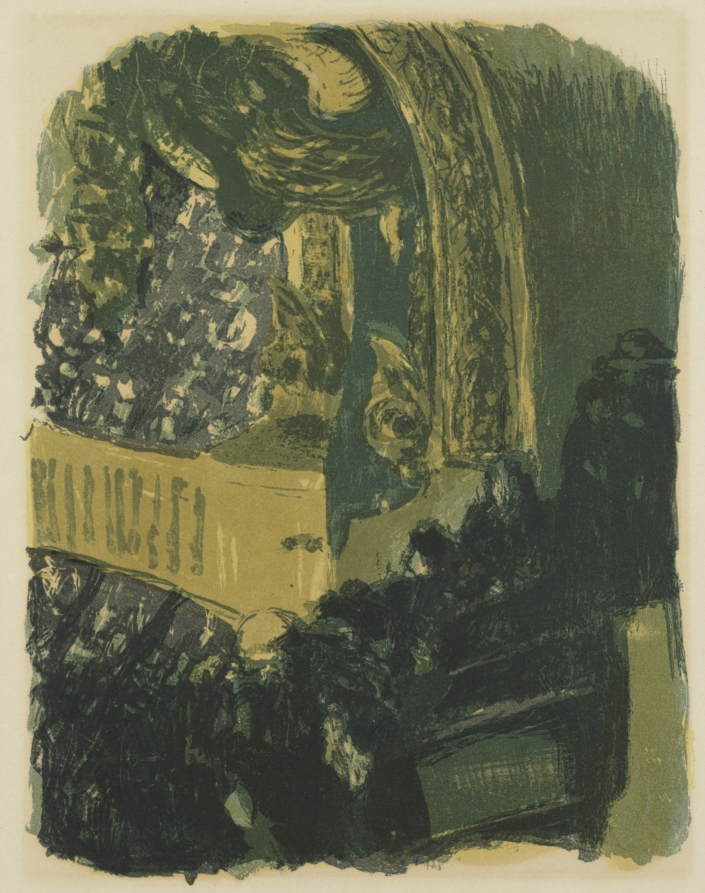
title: A Gallery at the Gymnasium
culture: France, 19th-20th century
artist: Édouard Vuillard (French, 1868–1940)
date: 1900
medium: color lithograph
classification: Print